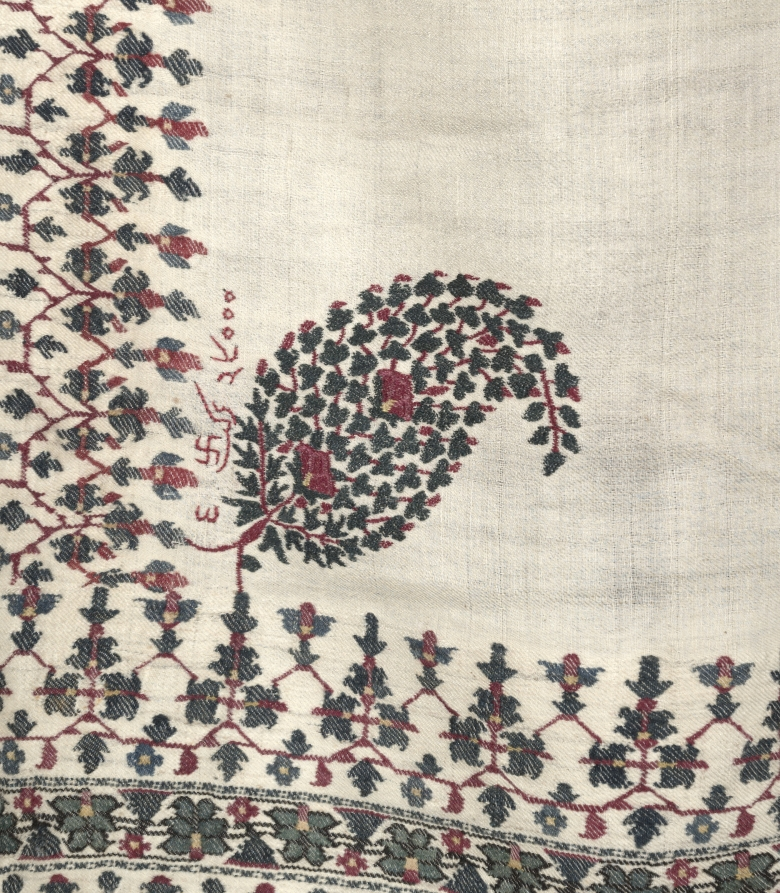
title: Long Shawl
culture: India, Kashmir, 19th century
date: c. 1815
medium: 2/2 twill tapestry weave, double interlocked; embroidery; wool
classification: Textile